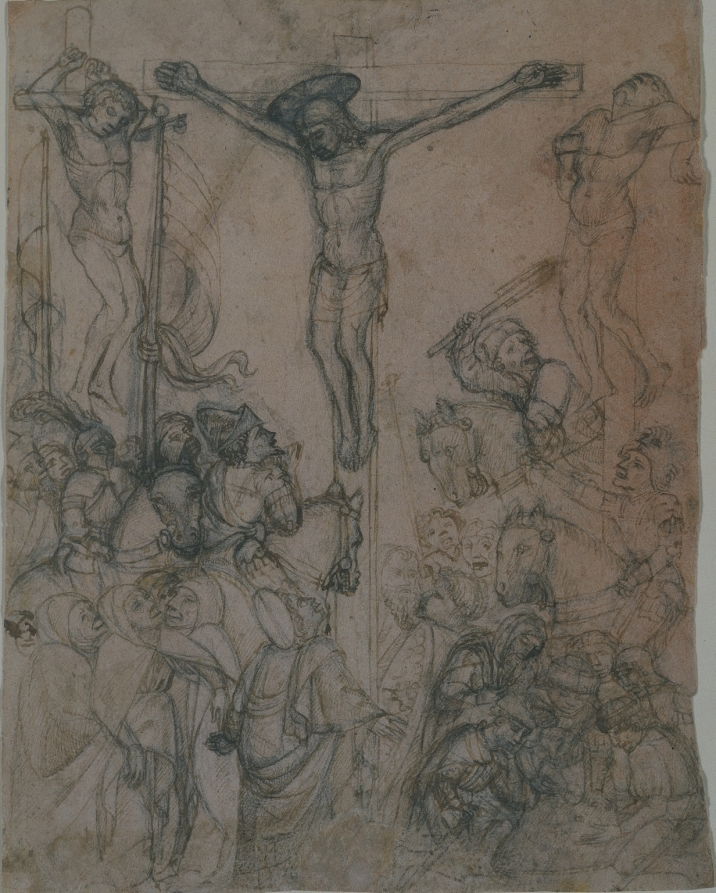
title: Crucifixion with the Two Thieves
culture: Italy, Piedmontese, 15th century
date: second half 15th century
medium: pen and brown ink and black chalk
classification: Drawing